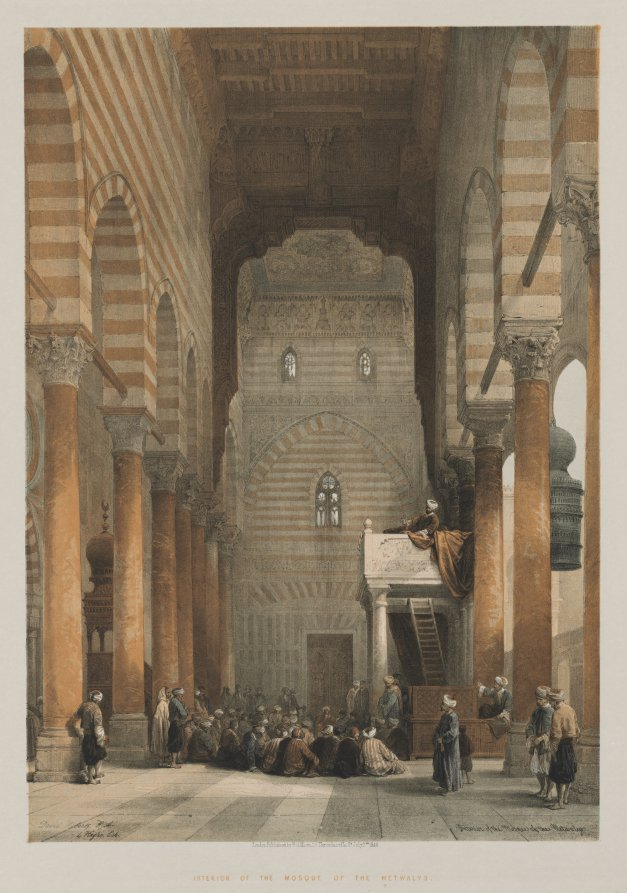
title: Egypt and Nubia, Volume III: Interior of the Mosque of the Metwalys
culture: England, 19th century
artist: Louis Haghe (British, 1806–1885)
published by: F. G. Moon, 20 Threadneedle Street, London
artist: after David Roberts (Scottish, 1796–1864)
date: 1849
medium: color lithograph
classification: Print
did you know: Through the columns on the left, there's a glimpse of the minbar, the staircaselike pulpit from which a sermon is delivered by the imam, prayer leader, after Friday services.